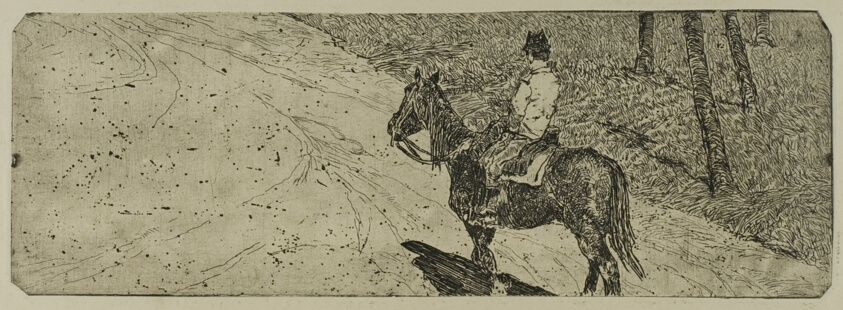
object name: Print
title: Cavalry Soldier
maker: Giovanni Fattori (Italian, 1825-1908)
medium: Soft ground etching, with plate tone, in black on cream wove paper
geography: Italy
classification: etching; paper; print; prints and drawing